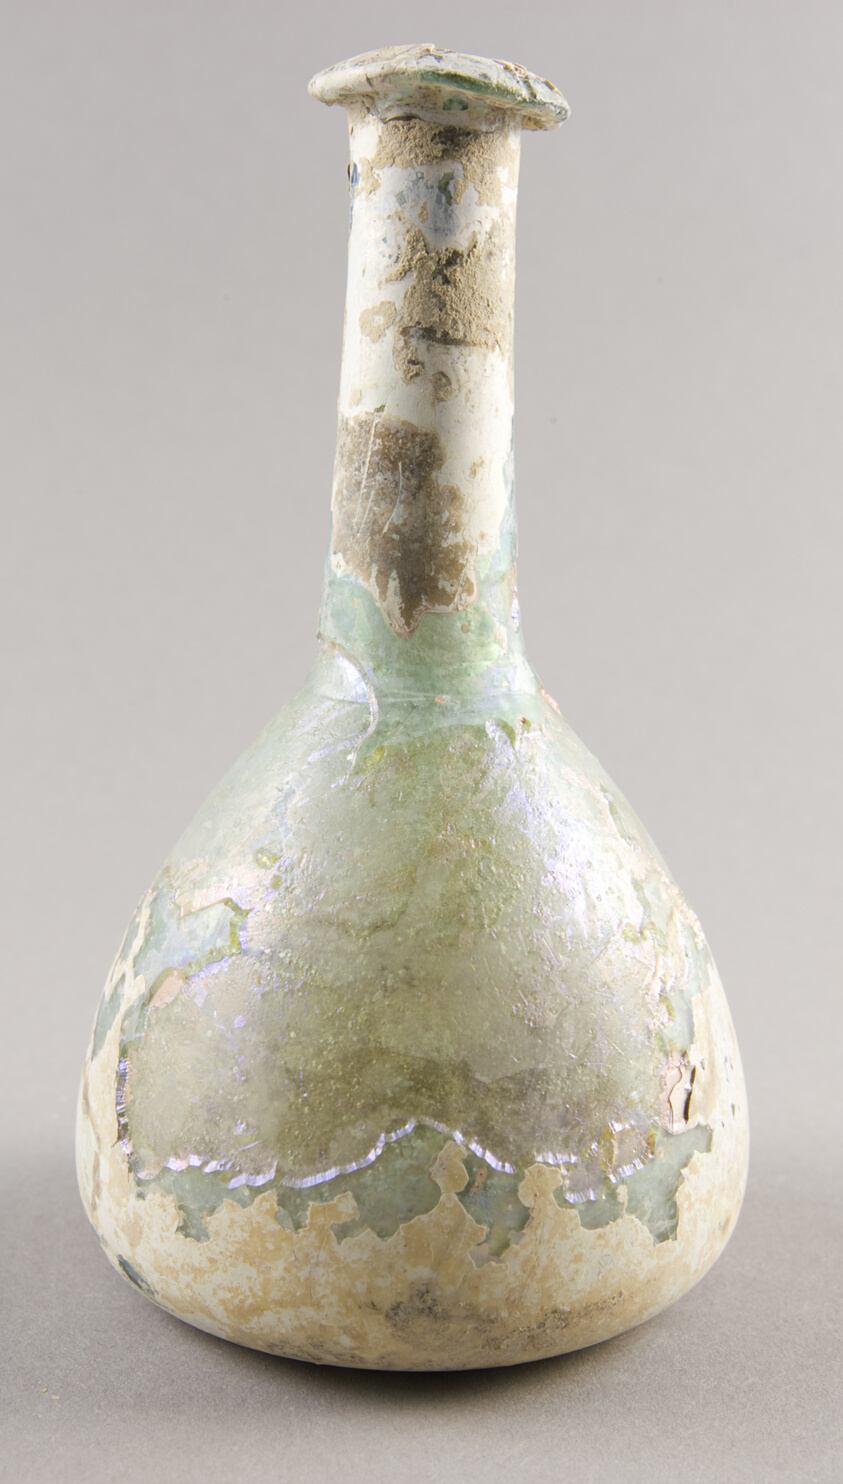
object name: Vessel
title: Bottle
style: syrian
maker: Roman; Eastern Mediterranean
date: 1st-3rd century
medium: Glass, blown technique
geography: Syria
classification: bottle; glass; vessel; ancient art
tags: bottles